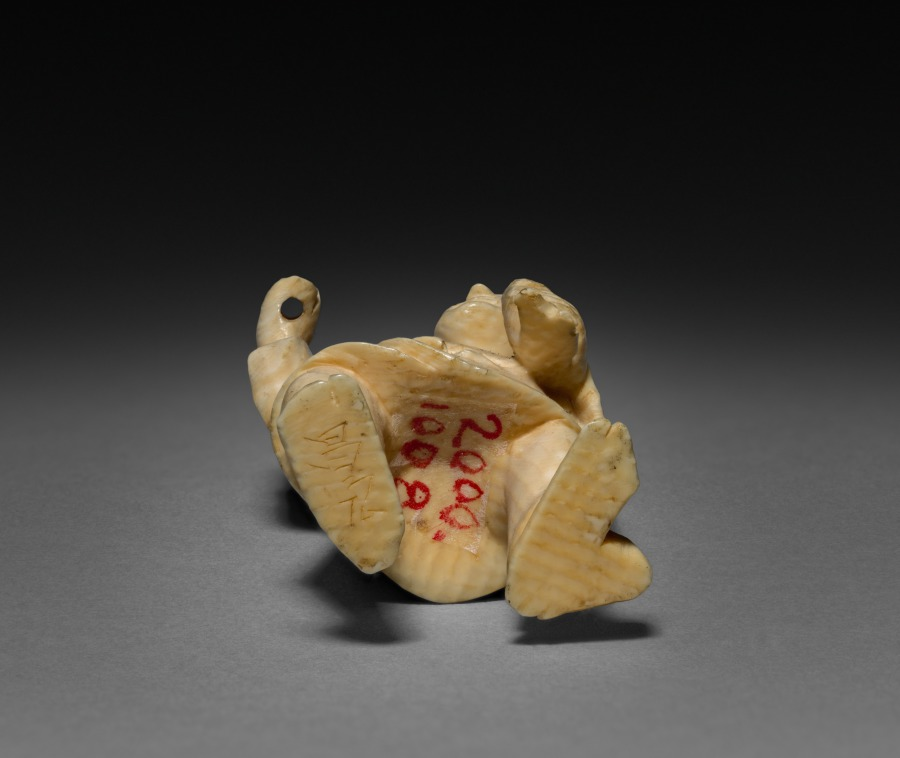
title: Man with Fish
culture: Japan, Meiji period (1868–1912)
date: early 1900s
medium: ivory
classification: Ivory